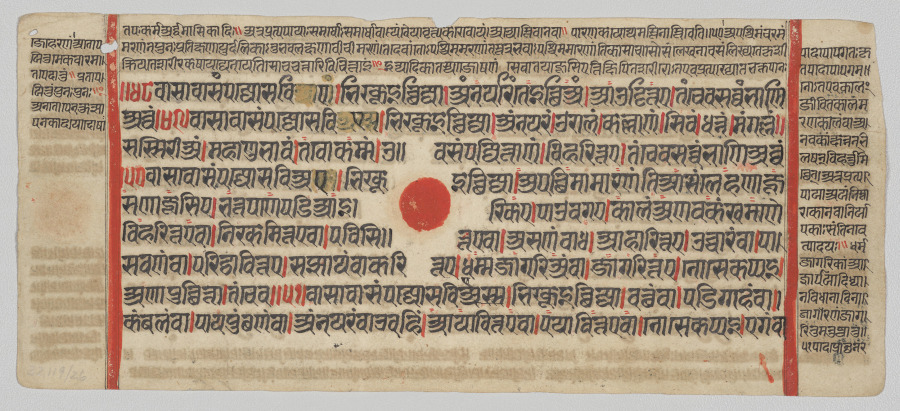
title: Text, Folio 75 (recto), from a Kalpa-sutra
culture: Western India, Gujarat, last quarter of the 15th century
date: c. 1475–1500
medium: Gum tempera, ink, and gold on paper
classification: Painting